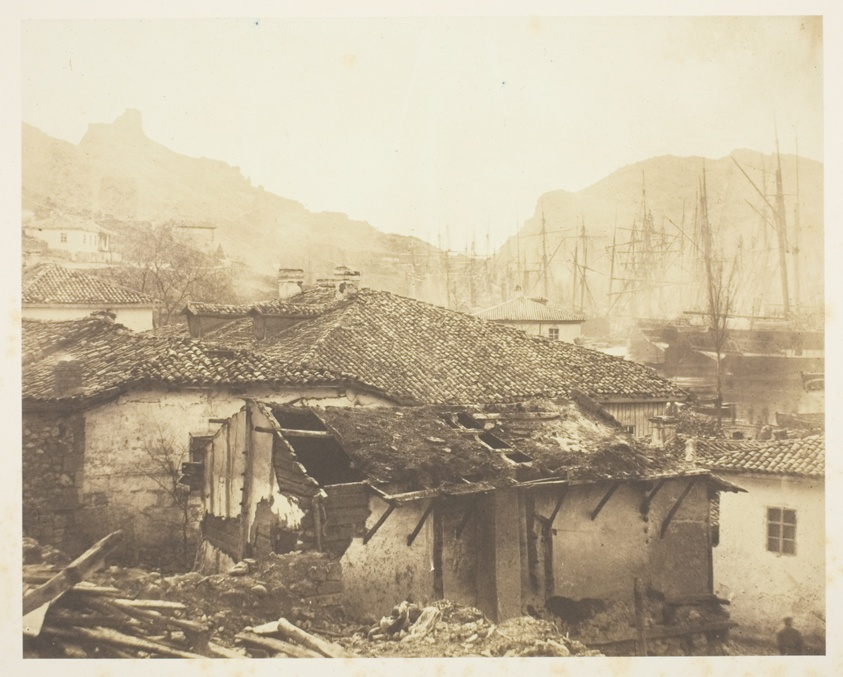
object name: Photograph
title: Cottages at Balaklava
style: 19th century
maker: Roger Fenton (English, 1819–1869)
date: 1855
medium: Salted paper print, from the album "Photographic Pictures of the Seat of War in the Crimea" (1856)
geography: England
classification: salted paper print; photographic process; photography; photograph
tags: Collected by Hugh Edwards